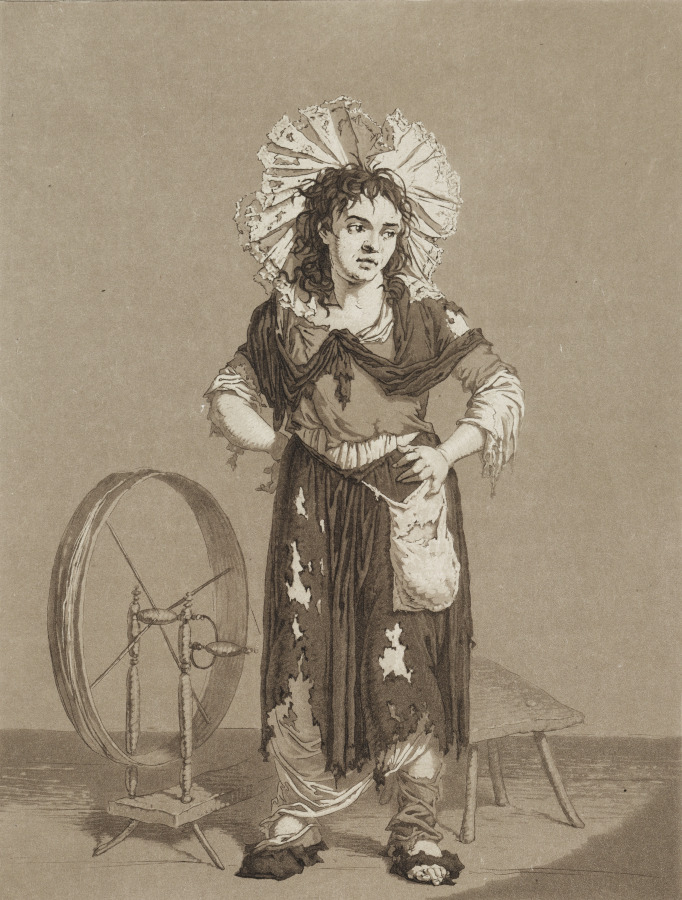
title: The Young Beggars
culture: Germany, late 18th-early 19th century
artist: Karl Ludwig Bernhard Buchhorn (German, 1770–1856)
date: c.1800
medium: aquatint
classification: Print